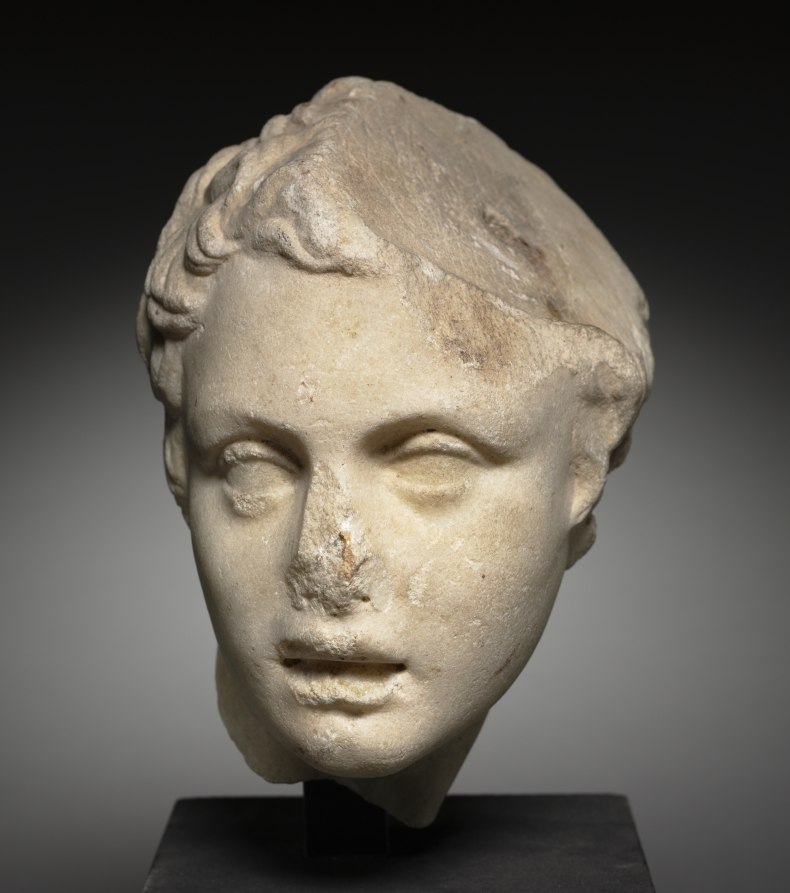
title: Eros, the God of Love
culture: Italy, Roman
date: 1–100 CE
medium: marble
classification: Sculpture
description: This is a Roman copy of the statue of Eros by Lysippus, the last of the great sculptors of Greece. He worked in the second half of the fourth century and was court sculptor to Alexander the Great. In the complete statue the god stood naked, his head turned to the right, his hand clasping a bow.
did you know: The oldest versions of Greek myth describe Eros, god of love and desire, as one of the first beings in existence.